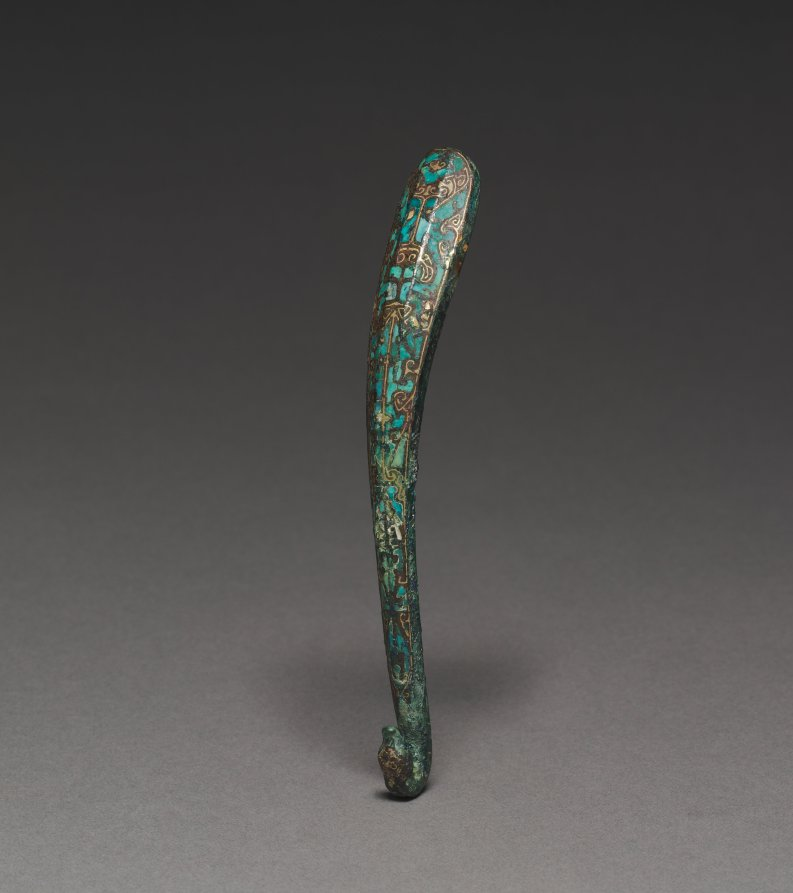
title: Belt Hook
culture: China, Warring States period (475–221 BCE)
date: 475–221 BCE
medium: front: bronze inlaid with gold and turquoise; back: gilt bronze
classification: Metalwork